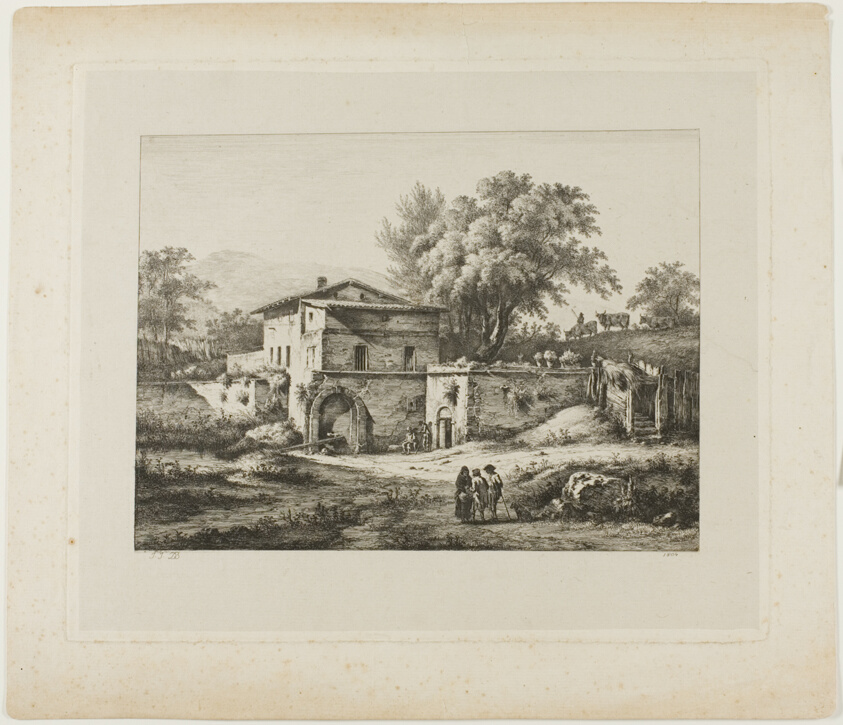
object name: Print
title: The Little Chapel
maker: Jean Jacques de Boissieu (French, 1736-1810)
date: 1804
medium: Etching on paper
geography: France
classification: etching; print; prints and drawing